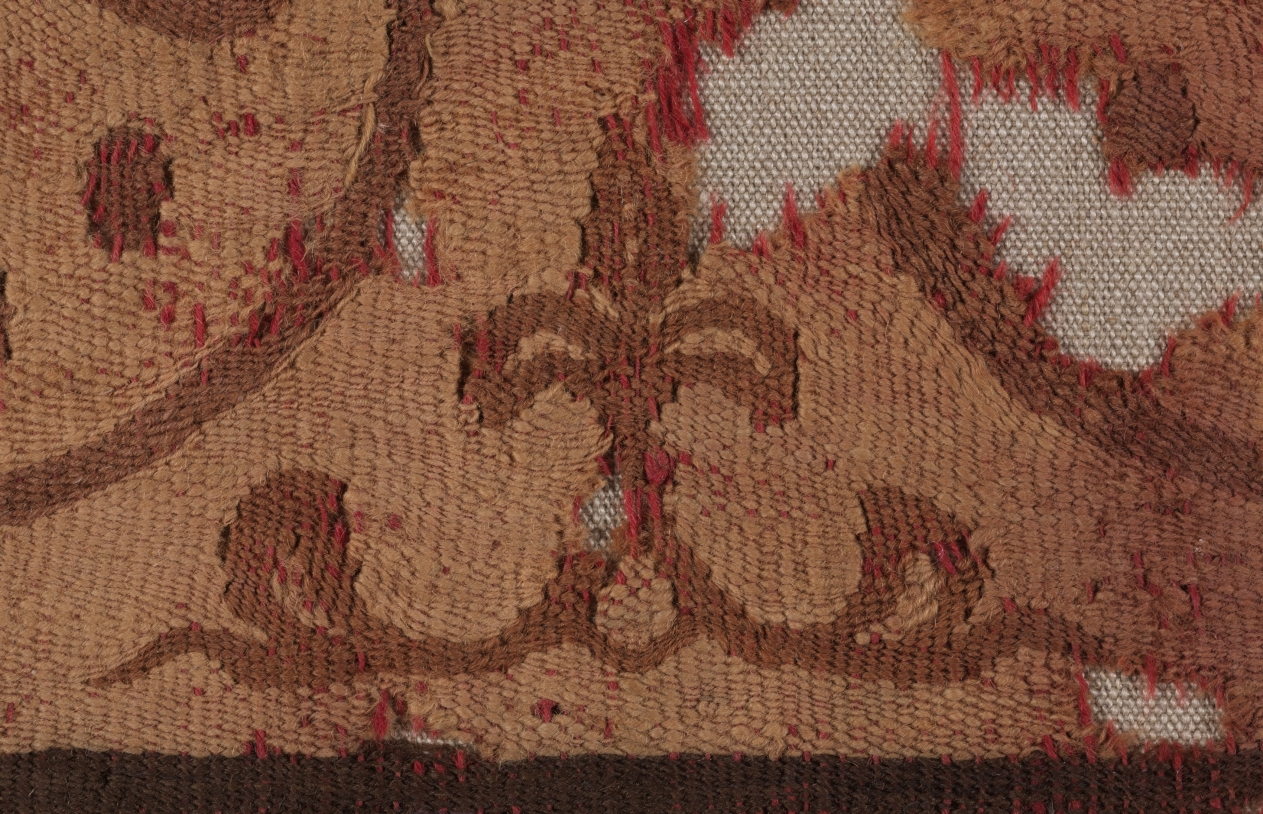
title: Fragmentary Icon Panel, Christ in Glory (?) and Evangelists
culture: Egypt, Abbasid period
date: 750 – 850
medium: slit-and dovetailed-tapestry weave; wool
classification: Textile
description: In this extraordinary fragment with a rare background resembling woven silk patterns, two roundels in the corners display the busts of haloed Evangelists holding books and raising their right hands in a gesture of teaching. In the center, the large roundel preserves traces of an enthroned figure, presumably that of Christ in Glory (the jeweled throne is visible on the left). A geometric pattern of zigzags and triangles decorates the border. Woven on a verticle loom, tapestry weave has colorful horizontal wefts that are interlaced only in the area needed for the pattern; slits are formed when the colored wefts turn back around the same vertical warp for several rows. Warp and wefts reference the basic directional patterns of weaving—warp being the longitudinal threads with the transverse weft being drawn over and under the warp.